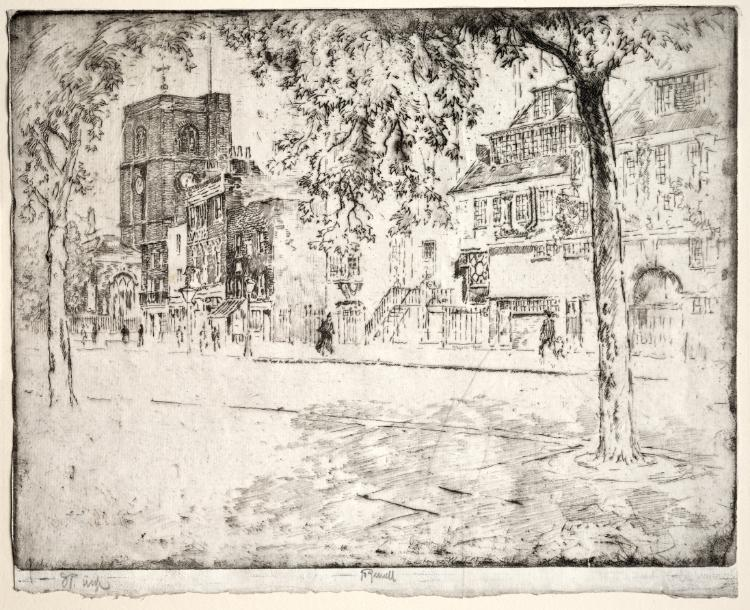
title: House Where Whistler Died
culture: America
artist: Joseph Pennell (American, 1857–1926)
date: 1904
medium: etching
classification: Print